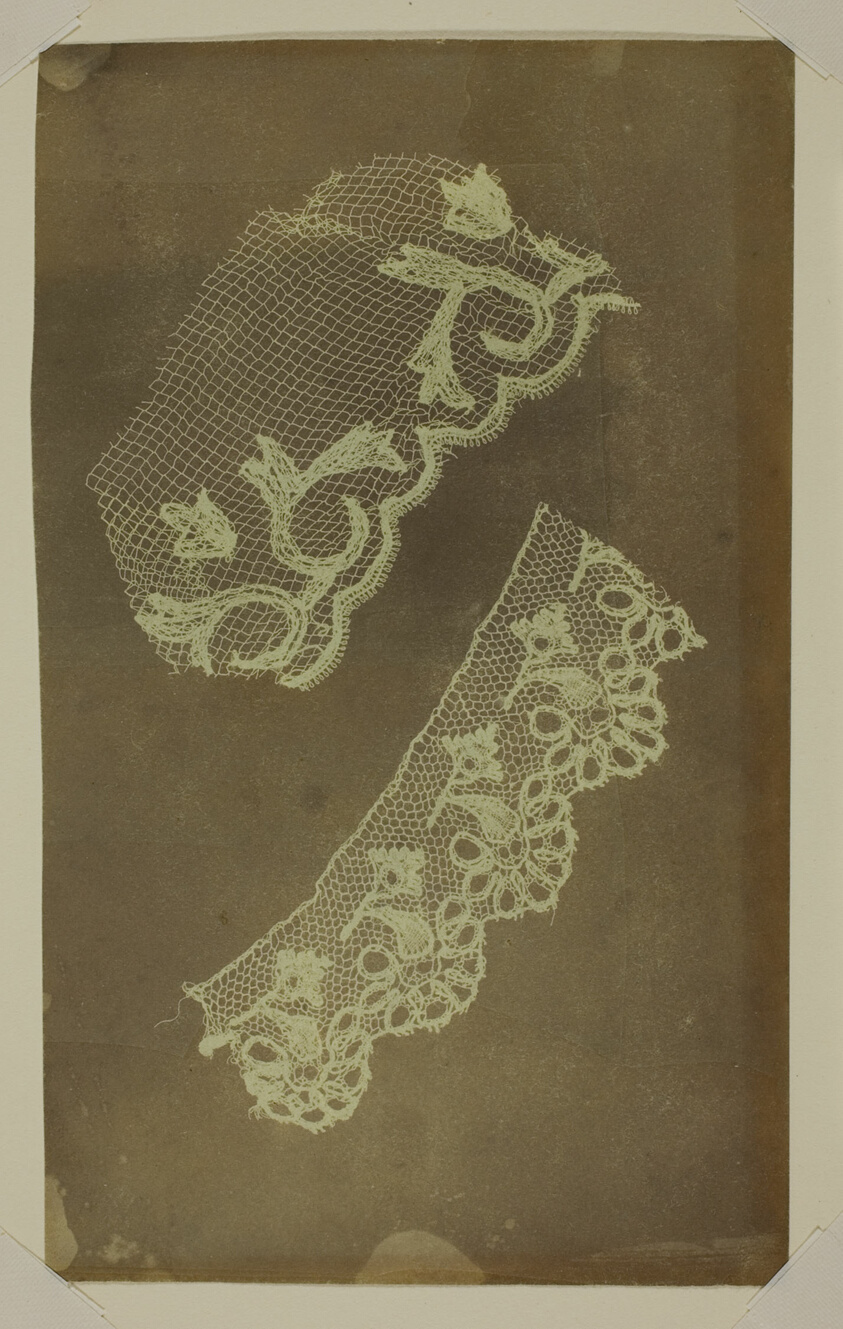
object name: Photograph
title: Two Scraps of Lace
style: 19th century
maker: William Henry Fox Talbot (English, 1800–1877)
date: c. 1838/42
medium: Photogenic drawing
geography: England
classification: salted paper print; photographic process; photography; photograph